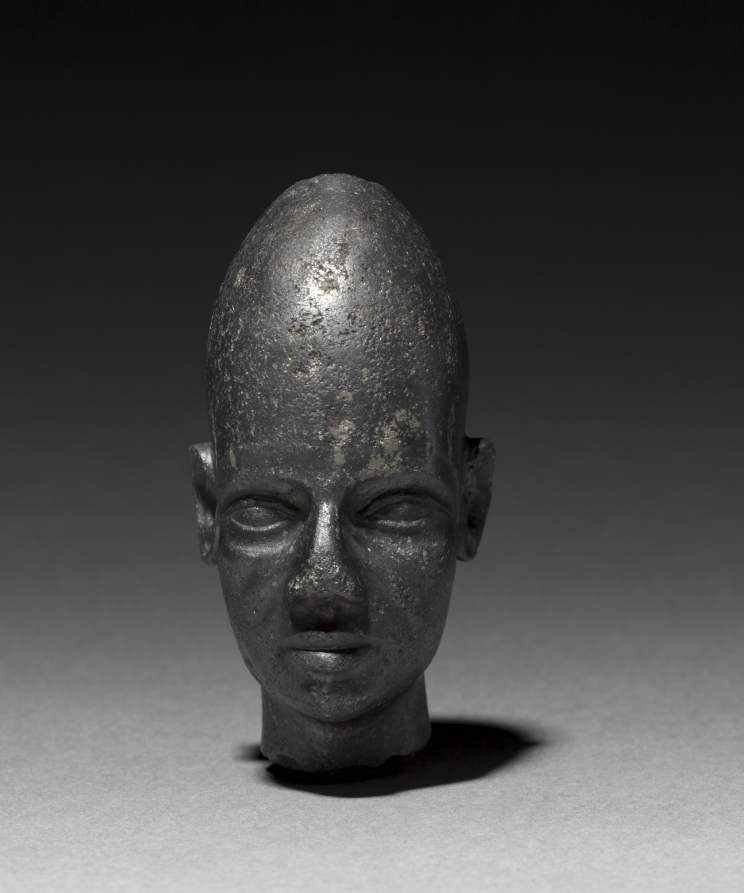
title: Head of Foreign God or Prince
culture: Egypt or Syria, New Kingdom (1540–1069 BCE), Dynasty 18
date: c. 1320 BCE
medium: black magnetite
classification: Sculpture